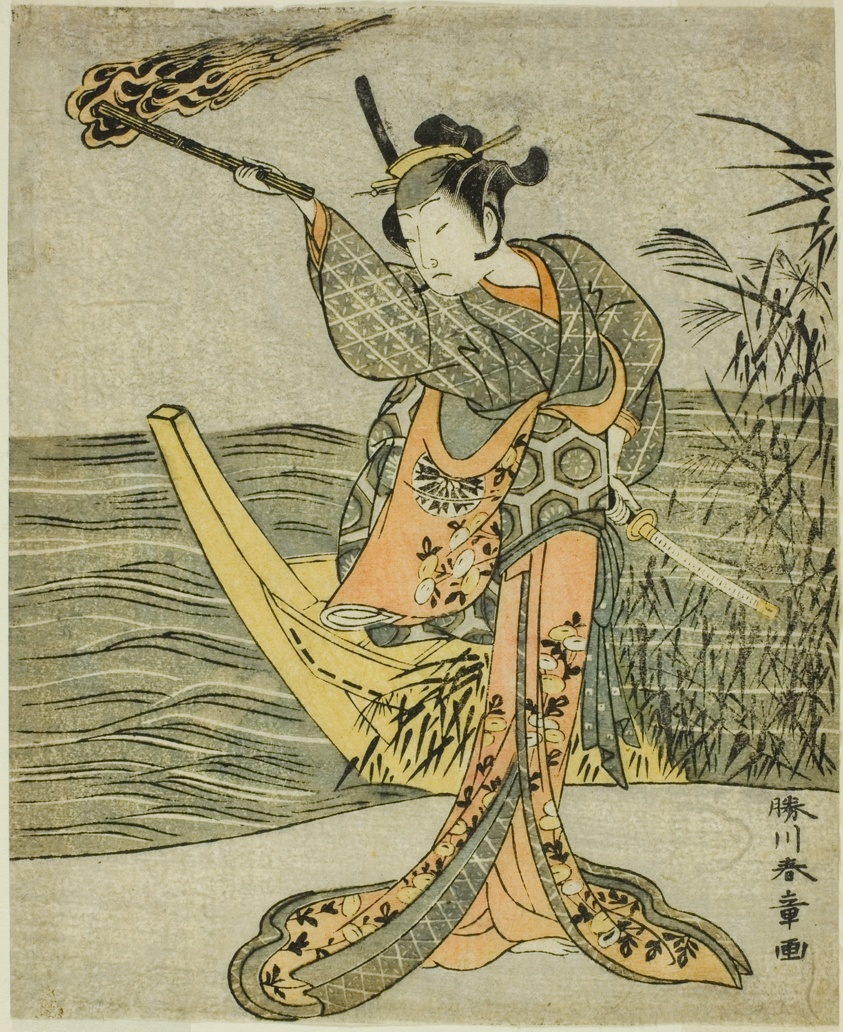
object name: Print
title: The Actor Nakamura Tomijuro I as Nagoya Osan in the Play Fuki Kaete Tsuki mo Yoshiwara (Rethatched Roof: The Moon also Shines Over the Yoshiwara Pleasure District), Performed at the Morita Theater in the Eleventh Month, 1771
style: Japanese (culture or style)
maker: Katsukawa Shunsho 勝川 春章; Japanese, 1726-1792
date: c. 1771/72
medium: Color woodblock print; from the illustrated book Yakusha Kuni no Hana (Prominent Actors of Japan)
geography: Japan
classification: woodblock print; print; asian art